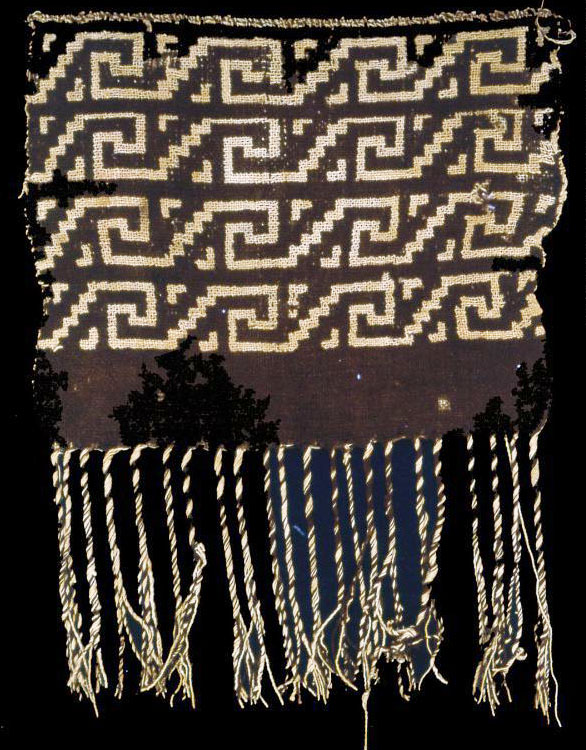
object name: Textile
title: Tassel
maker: Peru, Probably central or south coast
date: A.D. 1000/1476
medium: Cotton, plain weave double cloth with warp fringe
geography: Peru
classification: textile; weaving